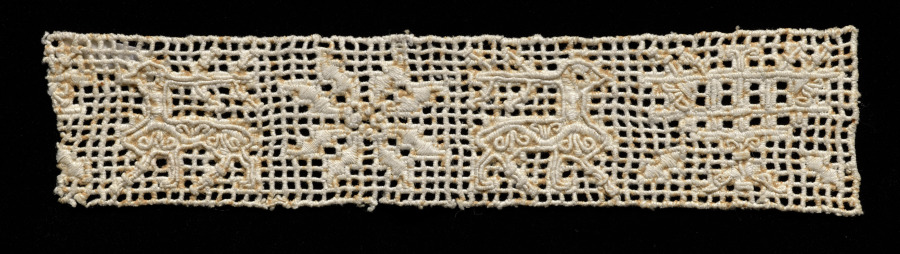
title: Lace fragment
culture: Italy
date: 1500s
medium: Linen: needle lace (drawnwork) insertion, embroidery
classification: Lace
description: This fragment features alternating stags and stars embroidered in curl and satin stitch.